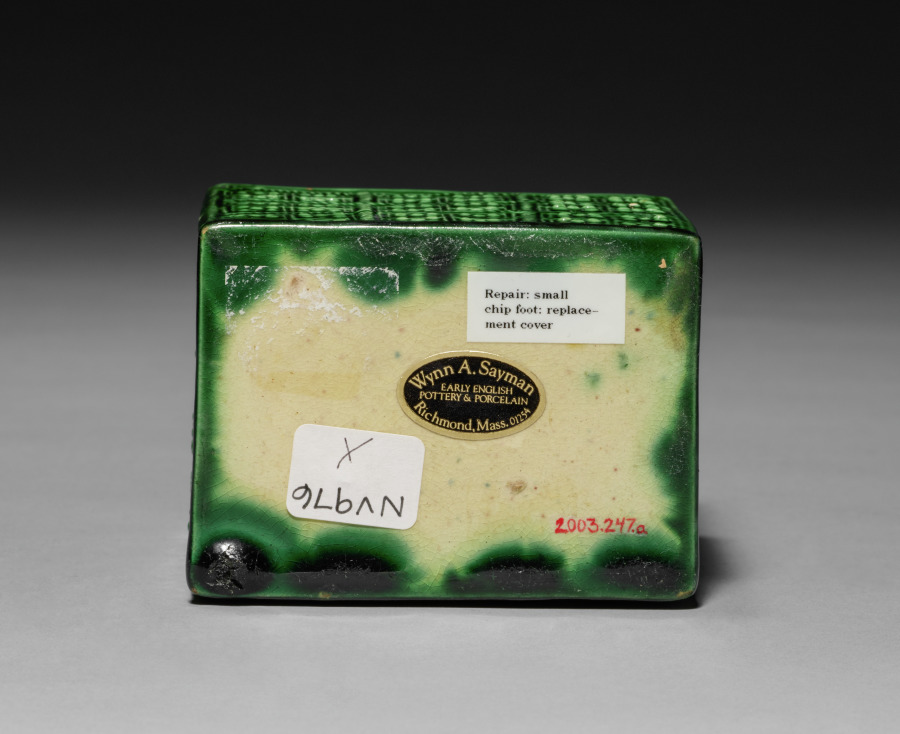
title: Tea Caddy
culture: England, 18th century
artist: Staffordshire Factory (British)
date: c. 1750–1800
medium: earthenware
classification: Ceramic